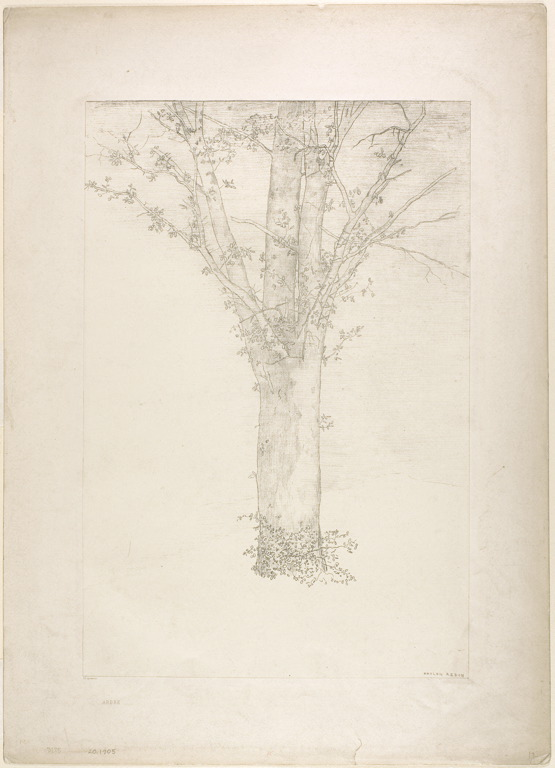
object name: Print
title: Tree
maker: Odilon Redon (French, 1840-1916)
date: 1892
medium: Lithograph in black on cream China paper laid down on ivory wove paper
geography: France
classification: lithograph; print; prints and drawing; paper